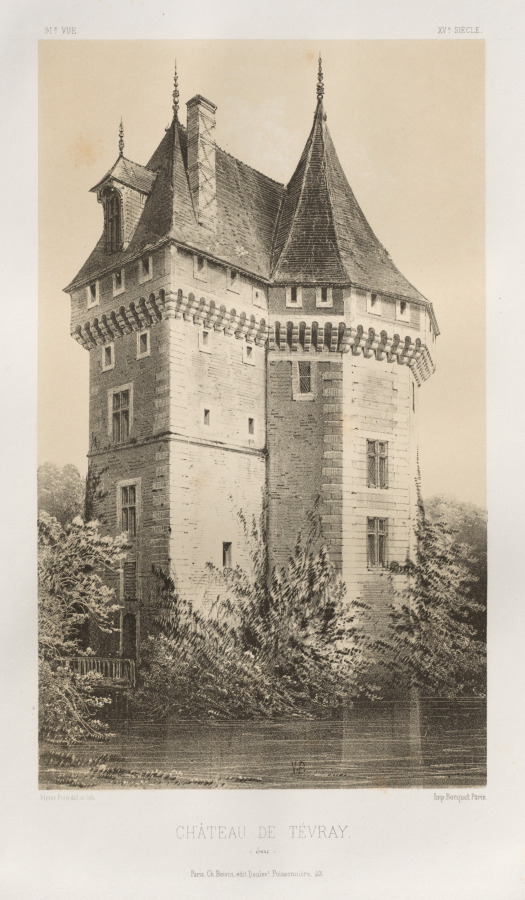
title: Architecture Pittoresque ou Monuments des XVeme. Et XVIeme. Siecles: Chateaux de France des XV et XVI Siecles: Pl. 91, Château de Tévray (Eure)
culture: France, 19th century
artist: Victor Petit (French, 1817–1874)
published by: Charles Boivin (publisher and editor); Lith de Godard a Paris (printer)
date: 1860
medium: lithograph with tint stone, from portfolio of 100 lithographs with tint stone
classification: Print